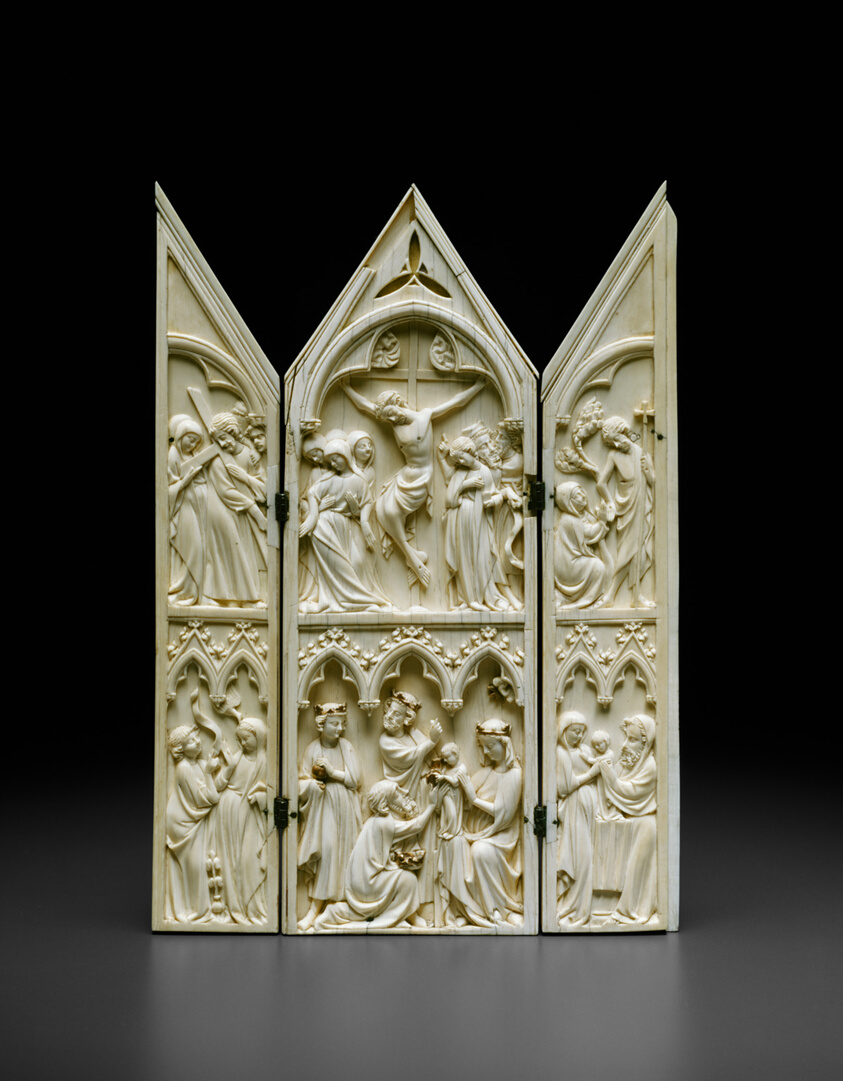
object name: Sculpture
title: Triptych with Scenes from the Life of Christ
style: 14th century, medieval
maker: German; Cologne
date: 1350/75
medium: Ivory with traces of gold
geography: Germany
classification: triptych; relief; sculpture; ivory; german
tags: Jesus, biblical, crucifixions, children, babies, mothers, fathers, death, resurrections, Christian subjects, Christianity, men, religion, religious figures, religious scenes, women